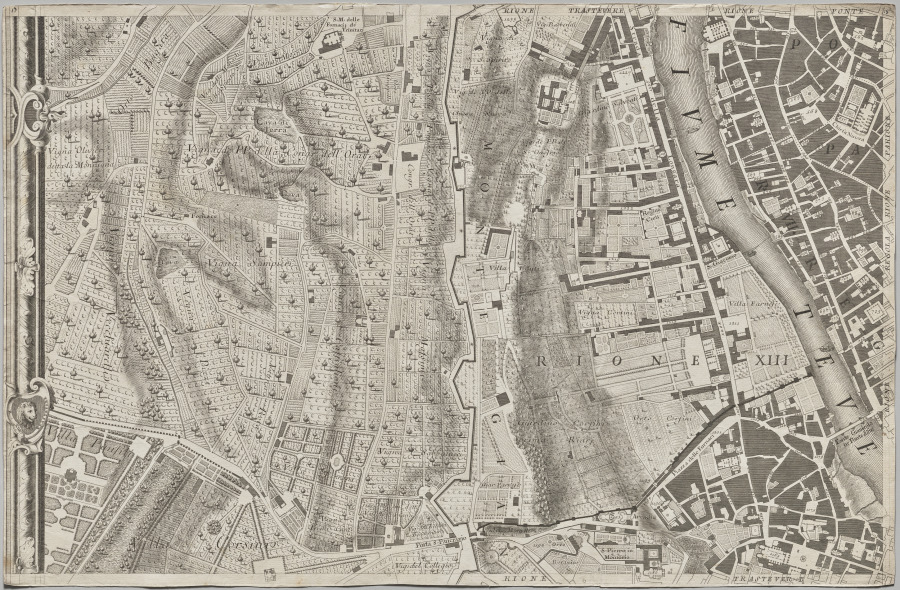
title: Nuova pianta di Roma data in luce da Giambattista Nolli l’anno MDCCXLVII, known as La Pianta Grande di Roma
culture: Italy, 18th century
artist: Giovanni Battista Nolli (Italian, 1701–1756)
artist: Carlo Nolli (Italian, 1690–1790)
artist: Rocco Pozzi (Italian, 1701–1774)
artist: Pietro Campana de Soriano (Italian, 1725–c. 1779)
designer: Stefano Pozzi (Italian, 1699–1768)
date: 1748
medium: etching and engraving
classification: Print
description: The monumental Pianta Grande di Roma, or Large Plan of Rome, which measures about 5 x 7 feet when its twelve plates are assembled, is a landmark in both cartography and printmaking. The map is considered the first scientific rendering of Rome, establishing new standards of accuracy and thoroughness when it was published in 1748. Devised by the Lombard architect and surveyor Giovanni Battista Nolli (Italian, 1701-56), the creation of the map required over ten years of surveying the city carried out by Nolli and a team of assistants with the help of new measuring devices. In Nolli’s “ichnographic” (also called “ground”) plan, architectural features and the urban infrastructure are reduced to a single horizontal slice, a minutely detailed footprint that conveys dimensions, proportions, and orientations to scale with the utmost clarity.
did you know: To make this map, Pope Clement XII granted the mapmaker permission to measure courtyards and other interior, inaccessible spaces in monastic communities, even those in nuns’ convents, which was controversial at the time.